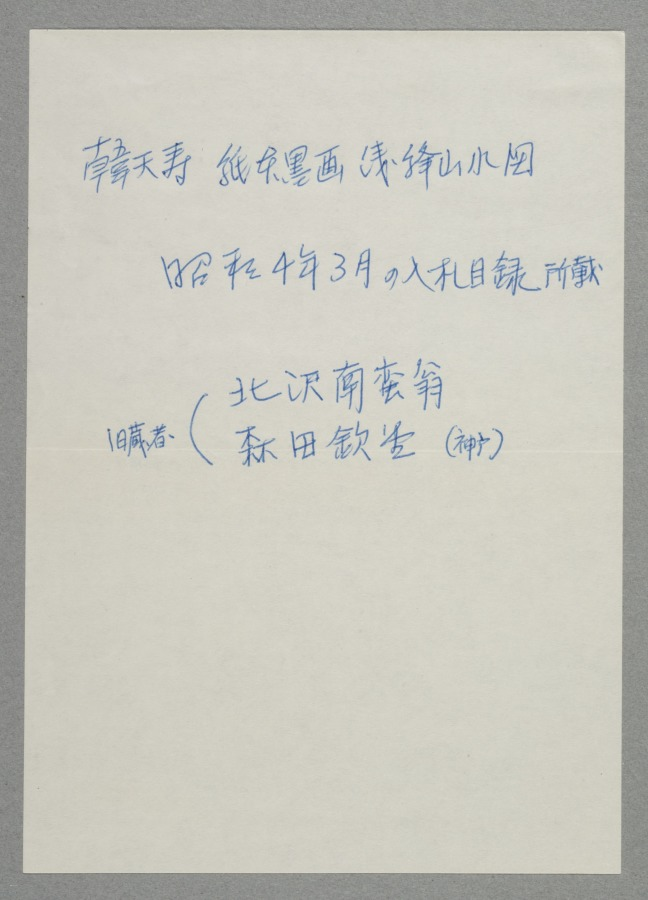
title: Landscape with Gentle Peaks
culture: Japan, Edo period (1615–1868)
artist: Kan Tenju (Japanese, 1727–1795)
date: 1767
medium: hanging scroll; ink and light color on paper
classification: Painting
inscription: 雨過嵐光煙／雲陽樹影諫／夕陽独在左／？卷讀残書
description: A figure sits in a retreat tucked into the mountains near a waterfall. The painter, Kan Tenju, was best known as a calligrapher and seal carver. Of Korean heritage, he was a patron of artist Ike Taiga (池大雅) (1723–1776), and a cousin of Taiga’s student Aoki Shukuya (青木 夙夜) (died 1802). His Chinese-style poem reads as follows: Smoky mist in the mountain reflects light after the rain, Sunlight passes through the clouds to cast shadows of the trees, Alone in the sunset, I read a well-worn book.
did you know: This painting combines image and calligraphy, connected by skillful brushwork.